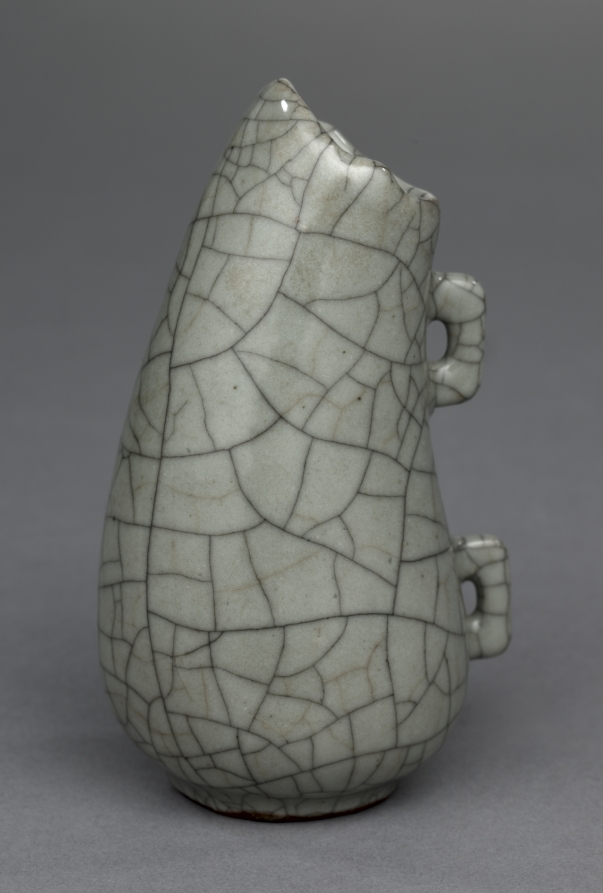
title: Water Flask: Guan ware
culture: China, Yuan dynasty (1271-1368)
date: 1271–1368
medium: glazed stoneware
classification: Ceramic